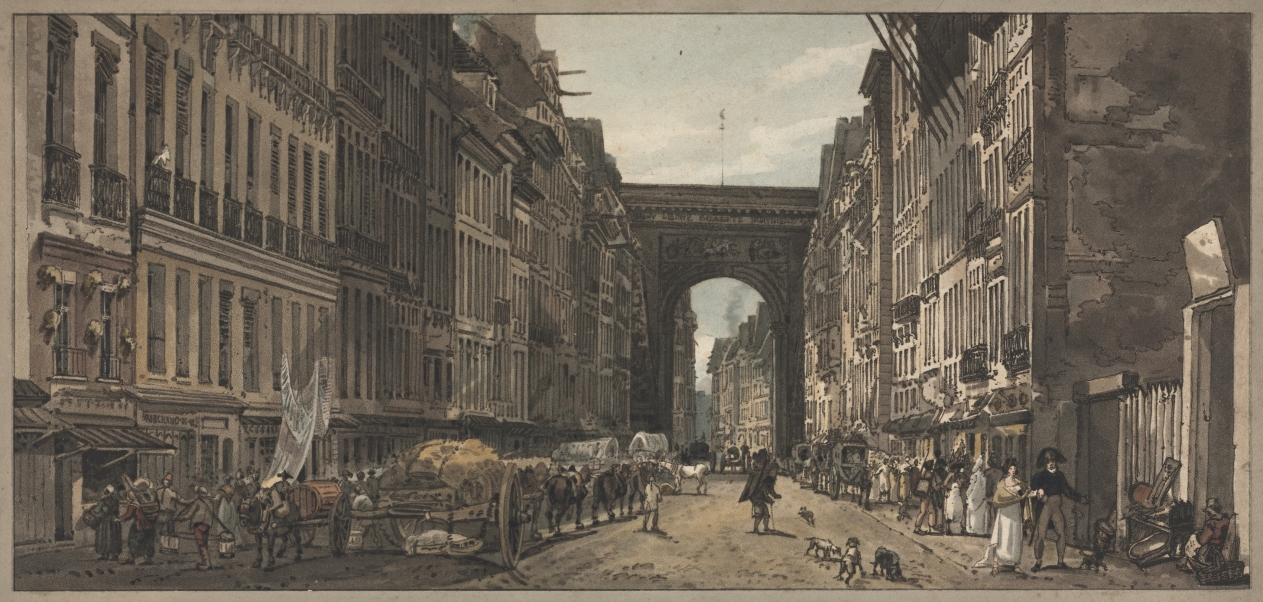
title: A Selection of Twenty of the Most Picturesque Views in Paris: View of the Gate of St. Denis taken from the Suburbs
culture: England, 19th century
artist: Thomas Girtin (British, 1775–1802)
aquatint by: Frederick Christian Lewis (British, 1779–1856)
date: 1803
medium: softground etching and aquatint, hand-colored with watercolor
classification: Print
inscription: Lower margin, in pencil: Early Proof